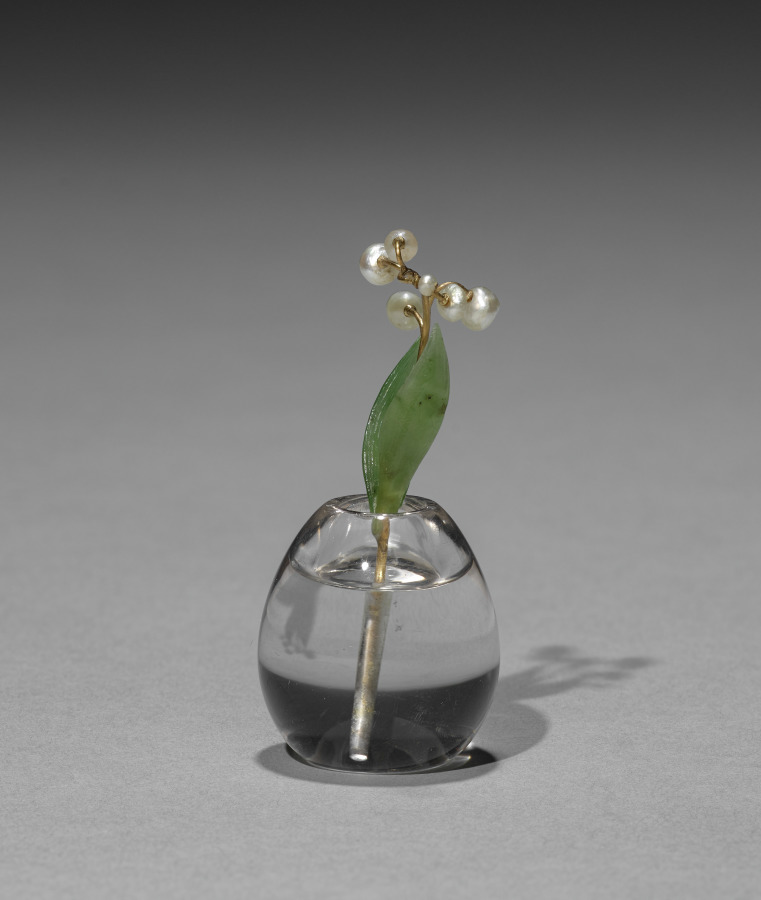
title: Flower Study of a Miniature Lily of the Valley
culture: Russia, St. Petersburg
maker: House of Fabergé (Russian, 1842–1918)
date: c. 1885–1915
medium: pearls, jade, rock crystal, gold, diamonds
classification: Miscellaneous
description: A small, carved rock crystal vase holds this lily of the valley study. The pearls, forming the flower’s buds, are drilled and attached to the remarkably slim gold stem. The hand-cut nephrite (jade) leaves enhance the naturalistic aura of the flower. Fabergé’s inspiration for his flower studies is said to have come from the floral brooches of precious stones that were made in the 1700s for Catherine the Great as well as from the Japanese art of flower arranging, known as ikebana.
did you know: Small and delicate, Fabergé’s flower studies were given as intimate gifts to friends by Tsarina Alexandra and others in the court. She kept them in all the palaces as a reminder of spring during the harsh Russian winters.